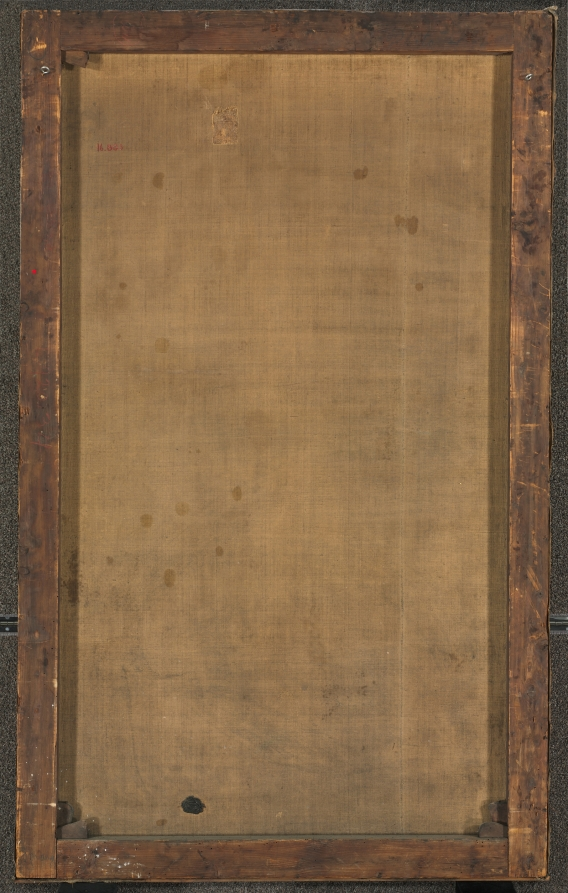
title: Ceres and Bacchus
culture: Flanders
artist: copy after Bartholomaeus Spranger (Flemish, 1546–1611)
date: 1600s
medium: oil on canvas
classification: Painting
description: This painting is a copy of a print by Jan Harmensz Muller (Dutch, 1571–1628), originally based on a painting by Spranger. Spranger often used the iconography of Ceres and Bacchus, two important agricultural deities. Muller's print has the Latin inscription Sine Cerere et Bacchio friget Venus, which translates to "without Ceres and Bacchus, Venus grows cold." The motto indicates that Love, represented by Venus, is impossible without the nourishment of food and drink, as the deities of grain and wine walk hand in hand.